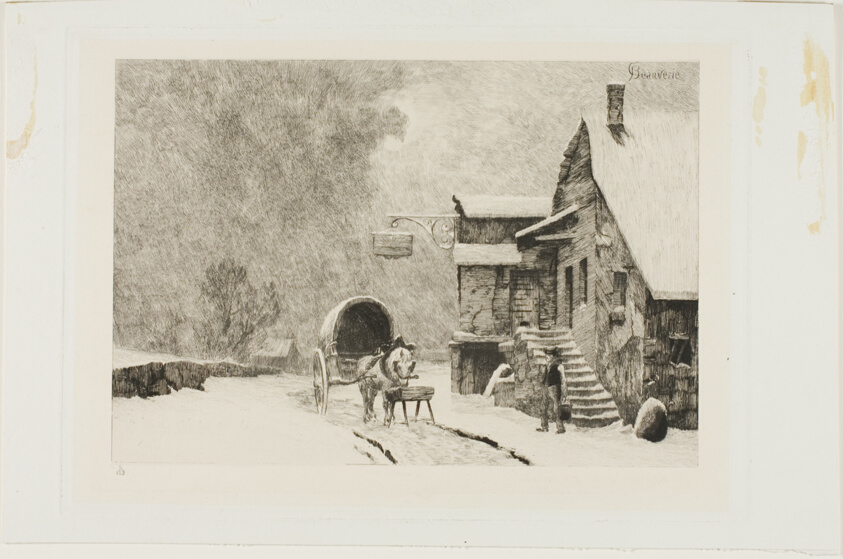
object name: Print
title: L'Auberge du soleil levant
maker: Charles Joseph Beauverie (French, 1839-1923)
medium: Etching on cream wove paper, laid down on ivory wove paper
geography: France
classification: etching; print; prints and drawing